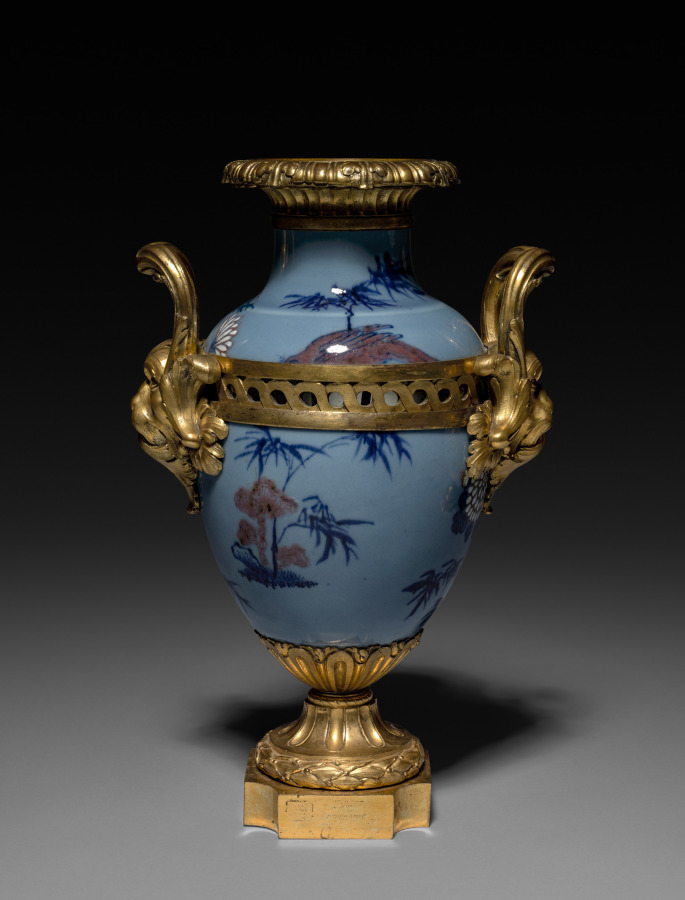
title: Garniture Set (one clock and 2 vases)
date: 1736–1770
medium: Chinese hard-paste porcelain, gilt bronze, enameled metal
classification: Furniture and woodwork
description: The fascination with Chinese porcelain among aristocratic circles increased during the reign of Louis XV. In reaction to the perceived excesses of elaborate naturalistic ornament of the 1750s, mount makers increasingly turned to neoclassical designs, known as Goût Grec (Greek taste) in the 1760s and 1770s. These beautifully chased gilt-bronze mounts feature classical Greco-Roman motifs such as lion masks, acanthus and laurel leaves, and pilasters.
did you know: A set of vases and clock, connected visually by the use of the same materials, often adorned a mantlepiece or the top of a large piece of furniture, such as a commode or console, within a room.